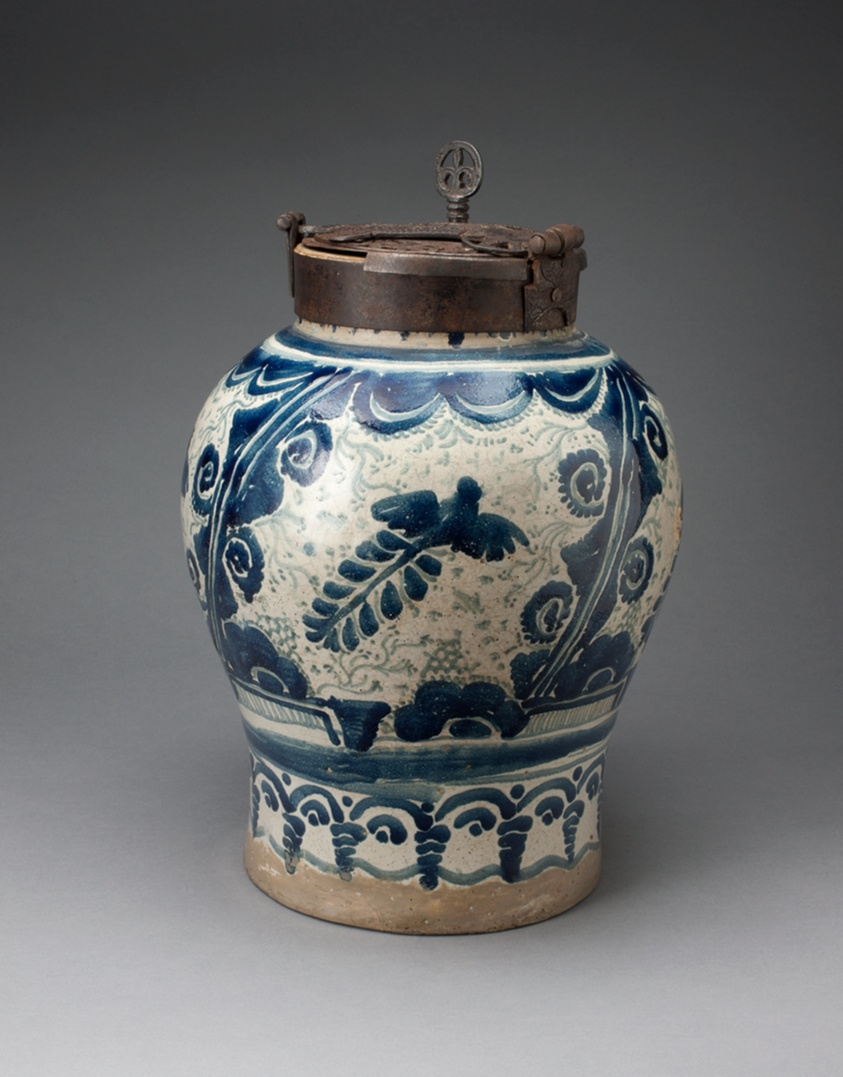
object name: Vessel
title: Chocolate Jar with Iron-locked Lid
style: talavera, Arts of the Americas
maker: Talavera poblana; Puebla, Mexico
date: 1725–75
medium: Tin-glazed earthenware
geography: Puebla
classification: earthenware; european decorative arts; ceramics; vessel; art of the americas